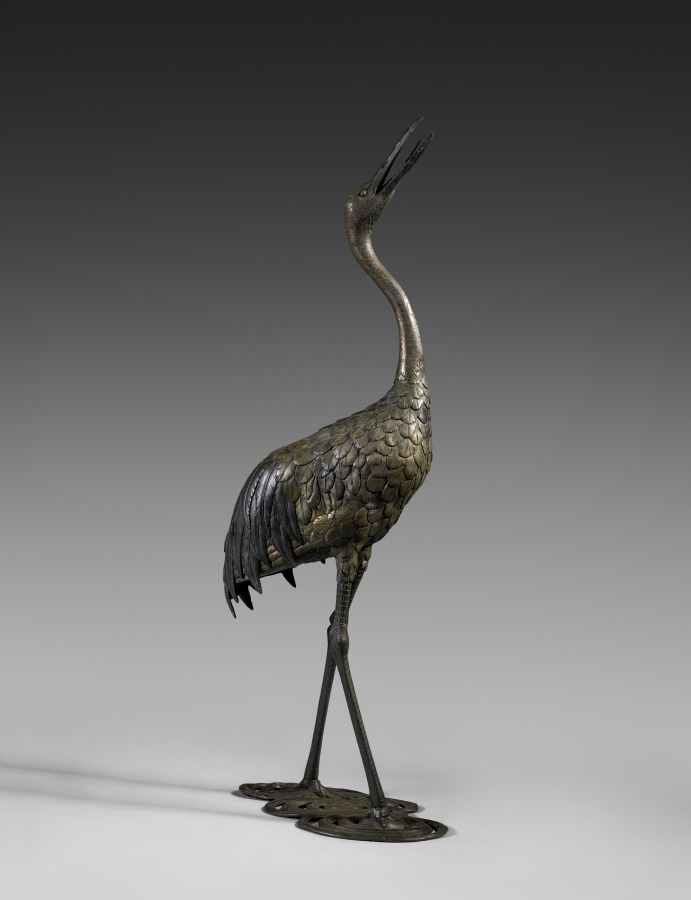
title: Crane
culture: Japan, Taishō period (1912–26) to Shōwa period (1926–89)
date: early to mid-1900s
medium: bronze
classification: Sculpture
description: This crane stands in water swirling around its feet, suggesting that it may have been intended for an interior setting without real water. Cranes symbolize longevity in East Asia, where they are said to live a thousand years. Representations of cranes are found across the centuries in cast metal form in Japanese religious settings. They are depicted as surface motifs on sacred objects, such as ritual mirrors, or as crane-shaped ornaments or incense burners. In the modern era, metal animals were made as sculptural works of art or as decorative objects for gardens.